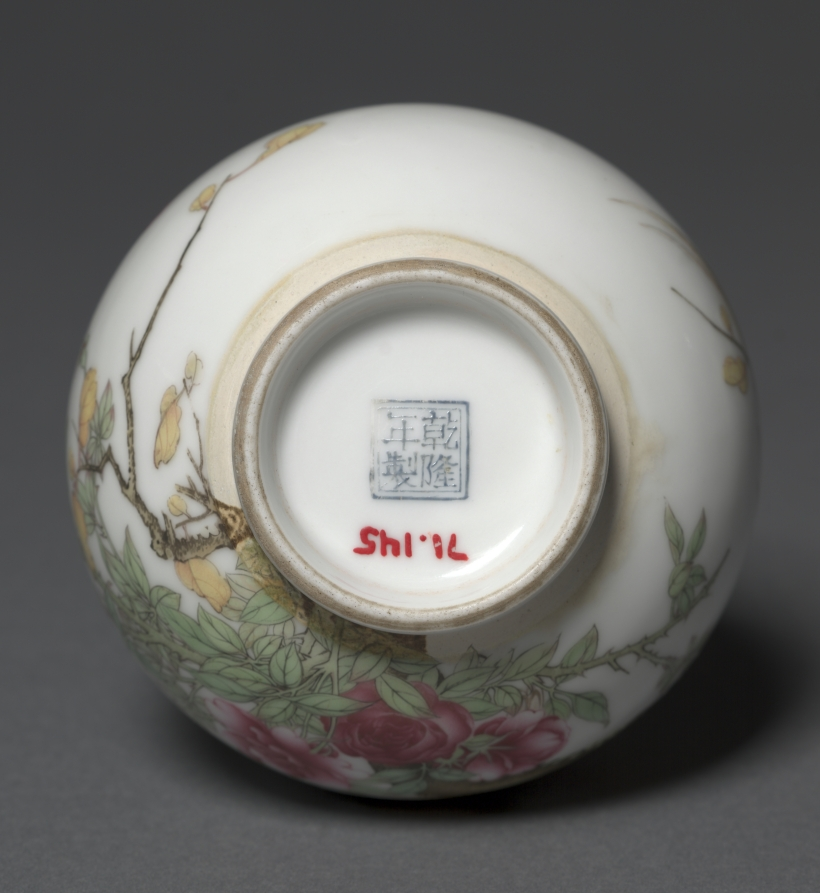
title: Vase with Golden Pheasants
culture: China, Jiangxi province, Jingdezhen kilns, Qing dynasty (1644-1911), Qianlong mark and period (1736-95)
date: 1736–95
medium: porcelain painted in polychrome enamels over transparent glaze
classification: Ceramic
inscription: 乾隆年製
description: The flower-and-bird painting in this vase was intricately executed in colored enamels (falangcai), with careful modeling, shading, and blending of colors reflecting European influences through missionary-artists at the Qing court. The Jesuit artist Giuseppe Castiglione (1688–1766), in particular, exerted tremendous impact at the Qianlong academy.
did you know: Refined porcelains produced in Jingdezhen kilns were sent to Beijing palace workshops to be decorated in falangcai technique under direct imperial supervision.